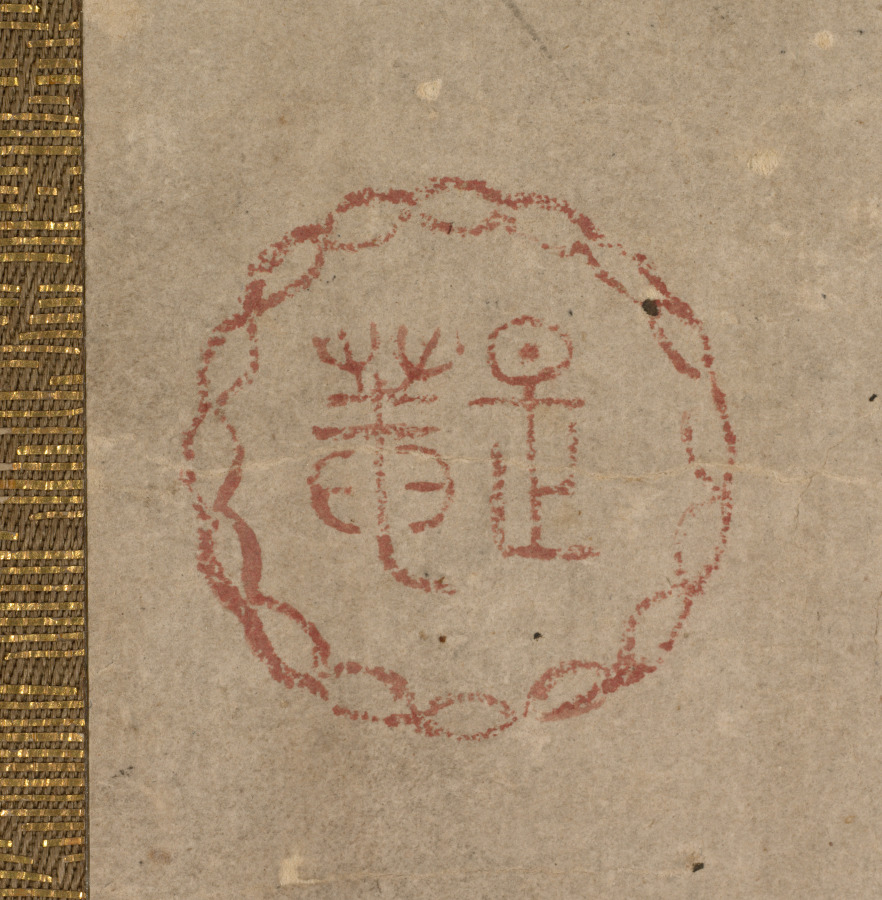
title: Sparrows and Bamboo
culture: Japan, Muromachi period (1392–1573)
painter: Shiken Saidō (Japanese, 1486–1581)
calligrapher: calligraphy by Ekkei Reikaku (Japanese, d. 1609)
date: mid- to late 1500s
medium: hanging scroll; ink on paper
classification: Painting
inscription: signed: Ekkei Reikaku daishi owaru inscription sealed: Reikaku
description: Shiken Saidō, whose style name was Ze'an, was a Zen monk who trained at Shōkokuji temple in Kyoto, and designed the garden of Reiun’in at Myōshinji temple. He painted landscapes in the style of painter and art advisor to the shogun, Sōami (died 1525), as well as bird-and-flower compositions. A poetic inscription by the monk Ekkei Reikaku accompanies this gentle composition of two sparrows perched on bamboo.